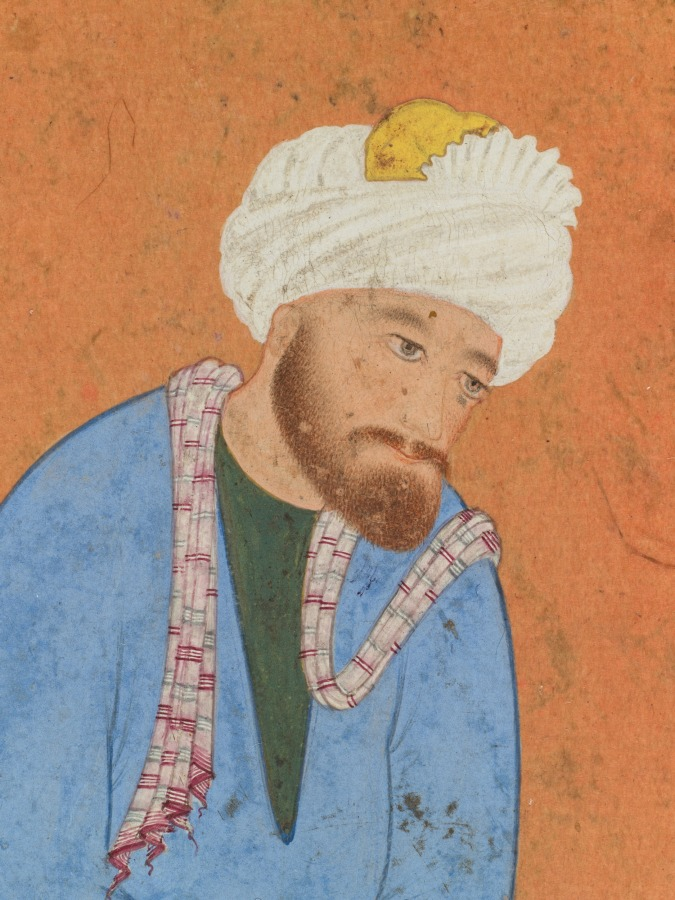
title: Portrait of a kneeling holy man, from the Prince Salim Album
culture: Mughal India, court of Akbar (reigned 1556–1605)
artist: attributed to Mir Sayyid Ali (Persian, active in Iran 1540s–50, active in India 1555–1580)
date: c. 1556–60; border c. 1602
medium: Gum tempera, ink, and gold on paper, laid down on an album page with cream borders decorated with gold flowers and geometric motifs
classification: Painting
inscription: [[verso, upper left corner]] 6212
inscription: [[verso, upper left corner]] 20.865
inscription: [[verso, upper center, below crossed out words and circled]] red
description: The kneeling figure is a charlatan holy man who wears the blue robe of a Sufi mystic. According to the inscriptions above and below the painting, he acts humble and pious for monetary gain rather than sincerity of devotion. Images of charlatan holy men recur in Mughal painting, including in the Cleveland Tuti-Nama. Mir Sayyid Ali was the first head of the Mughal workshop under Akbar. He was responsible for training Indian artists to adopt Persian sensibilities, admired by elites of the Islamic world during the 1400s to at least the 1700s.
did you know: In this sensitive portrayal of a charlatan holy man, the eyes are pale and empty.